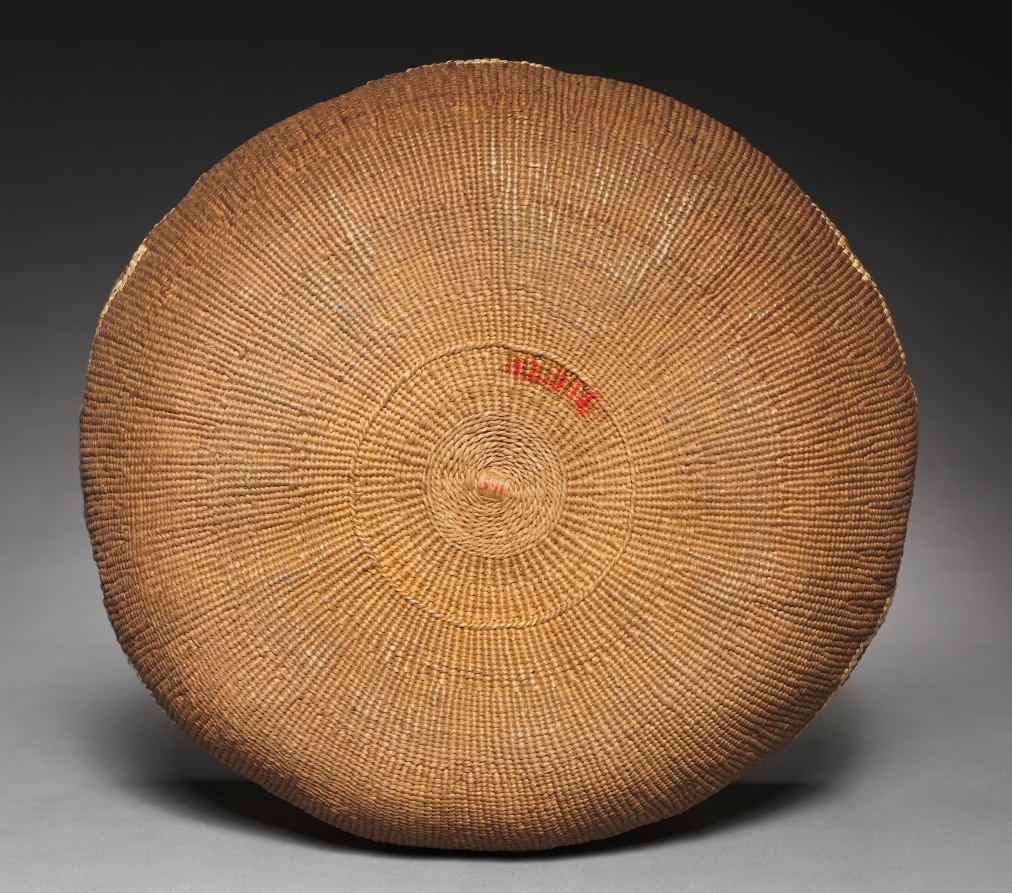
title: Cooking Bowl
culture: California, Karok or Hupa, Unassigned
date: Unassigned, before 1942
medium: twined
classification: Basketry